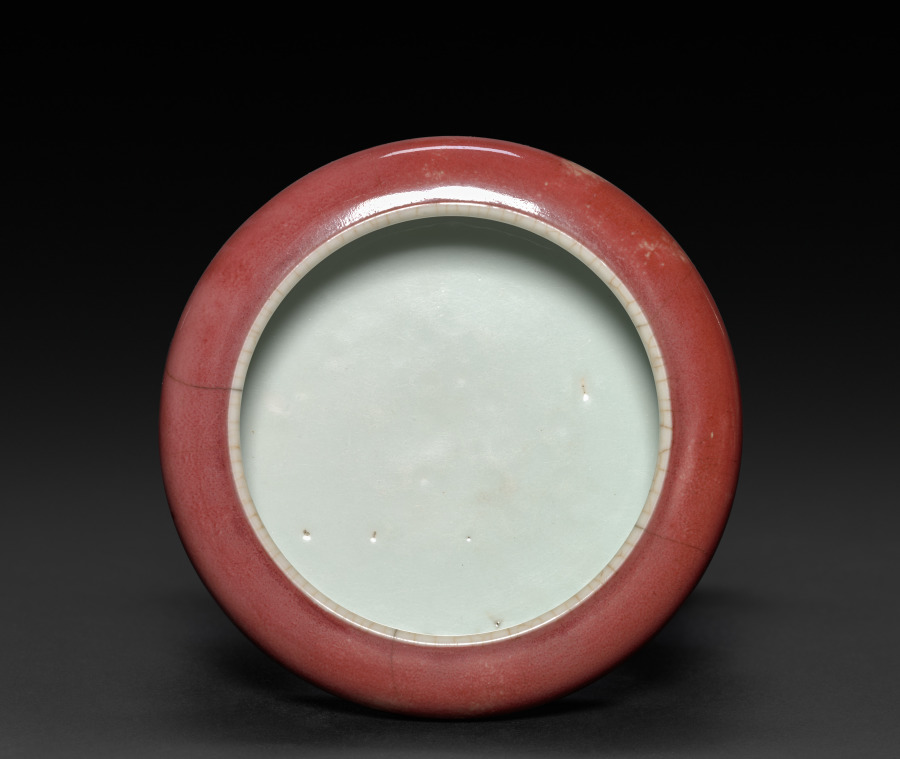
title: Gong-shaped Brush Washer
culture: China, Qing dynasty (1644-1911), Kangxi reign (1662-1722)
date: 1662–1722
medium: porcelain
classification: Ceramic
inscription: 大清康熙年製